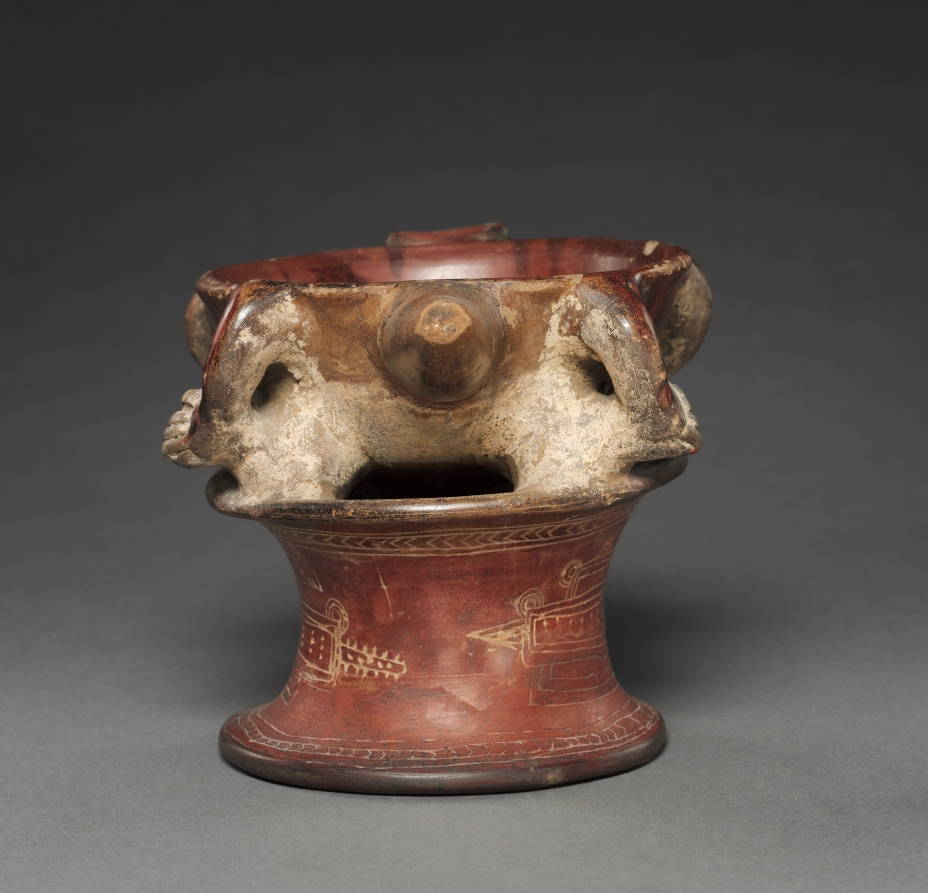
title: Jaguar Bowl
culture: Colombia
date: c. 850–1500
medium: resist-painted earthenware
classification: Ceramic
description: Probably from the southern highland region of Colombia, this unusual vessel has a bowl in the form of a comically fierce jaguar, mounted atop a pedestal base.